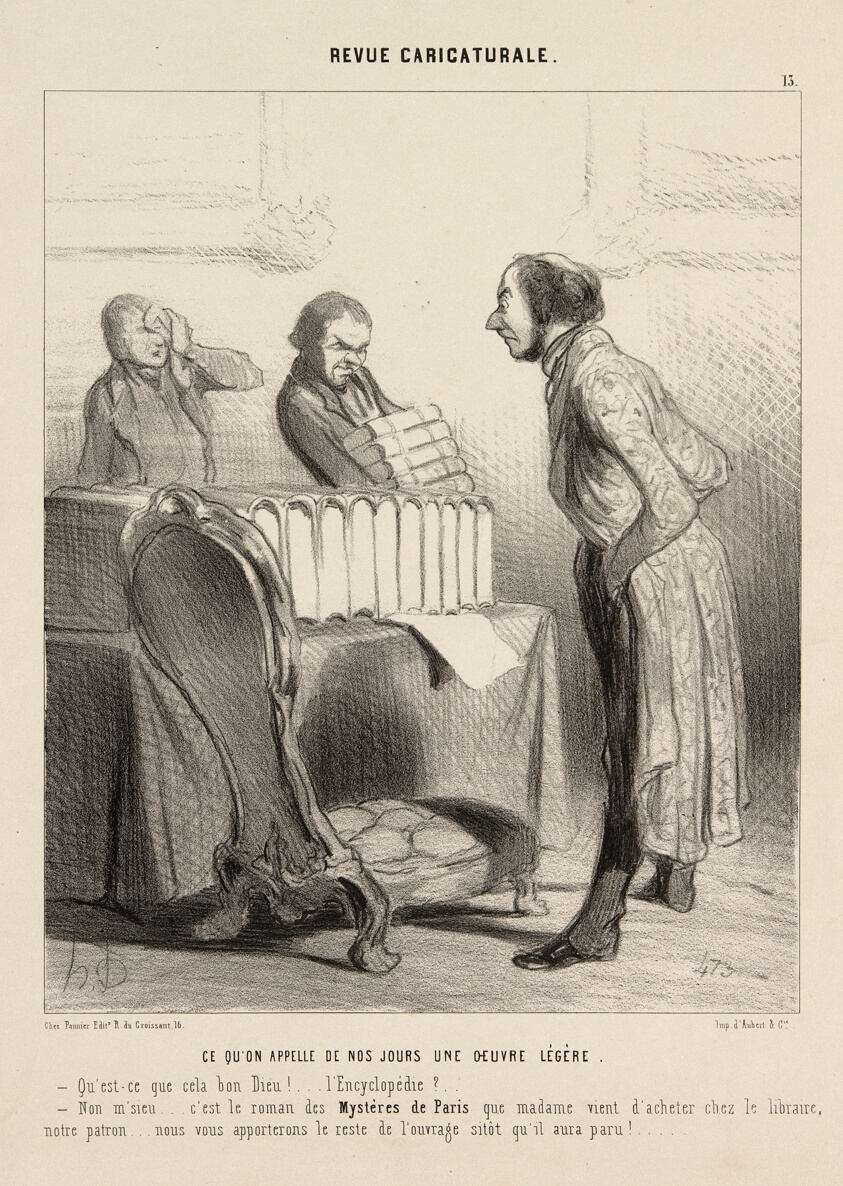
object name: Print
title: This is What Nowadays is Called a Light Work. “- My God, what's this!.... an encyclopaedia? “- No sir.... it is the novel 'the mysteries of Paris' that Madame bought at the bookshop of our Master. We will bring you the rest of the oeuvre as soon as it appears,” This is What the Royal Printer is Sending Us. “- What! I was told I would get some light documentation about the question in question. - That's right, monsieur, we'll bring you the rest right away,” plate 13 from Revue Caricaturale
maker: Honoré Victorin Daumier; French, 1808-1879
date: 1843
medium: Lithograph in black on ivory wove paper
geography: France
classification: lithograph; print; prints and drawing